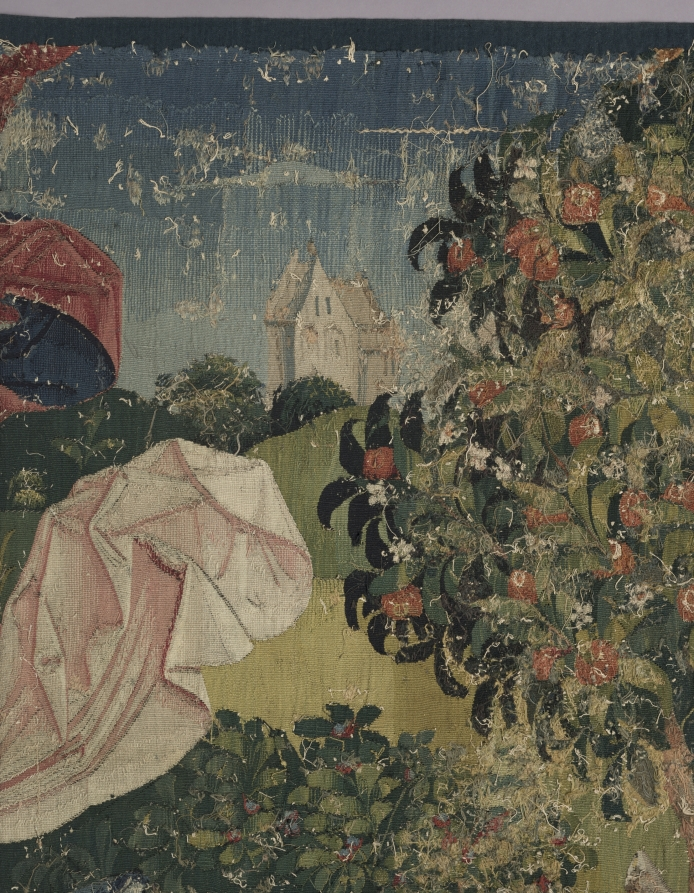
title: The Triumph of Eternity (from Chateau de Chaumont set)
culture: France, Lyon(?), early 16th century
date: 1512–15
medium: silk and wool; tapestry weave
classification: Tapestry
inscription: French verse in Gothic letters translates as follows: "Nothing triumphs by right authority, Unless it be conducted by Eternity. Nothing is permanent beneath the firmament, But above us triumphs Eternity."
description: The Triumph of Eternity is represented by the Coronation of the Virgin. Dressed in crimson velvet with an opulent brocaded velvet shawl, the Virgin is seated in the center as two angels hold a crown over her head. Five musical angels surround her playing an organ, recorder, straight cornetto, harp, and lute, while another sings from an open music book. The scenes in the set display a conservative style in which the figures are placed in shallow landscapes, thereby ignoring pictorial innovations for depicting space and mass. The verse in Old French at the top states: Nothing triumphing by due authority Remains permanent and durable. Nothing is permanent under the heavens, But above, eternity triumphs.